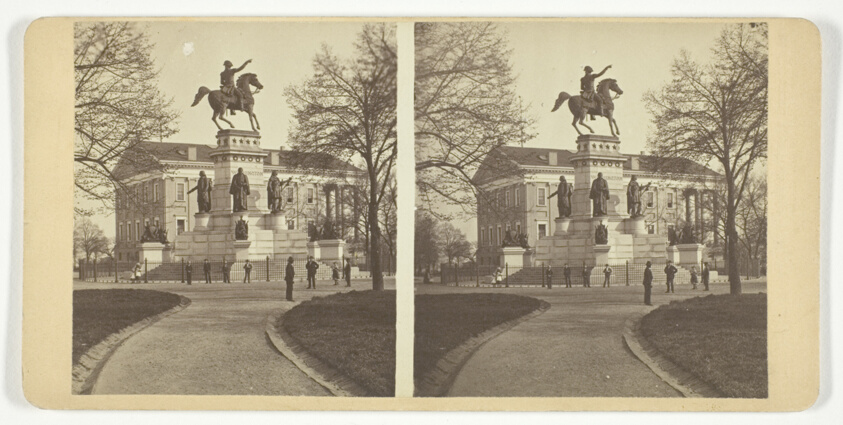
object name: Photograph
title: Washington Monument and State Capitol, No. 1311 from the series "Views of Richmond and Vicinity, and Mountain Scenery of Virginia and West Va."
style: 19th century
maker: Artist unknown; American, late 19th century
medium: Albumen print, stereo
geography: Richmond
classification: photography; photograph; albumen silver print; stereograph (albumen)